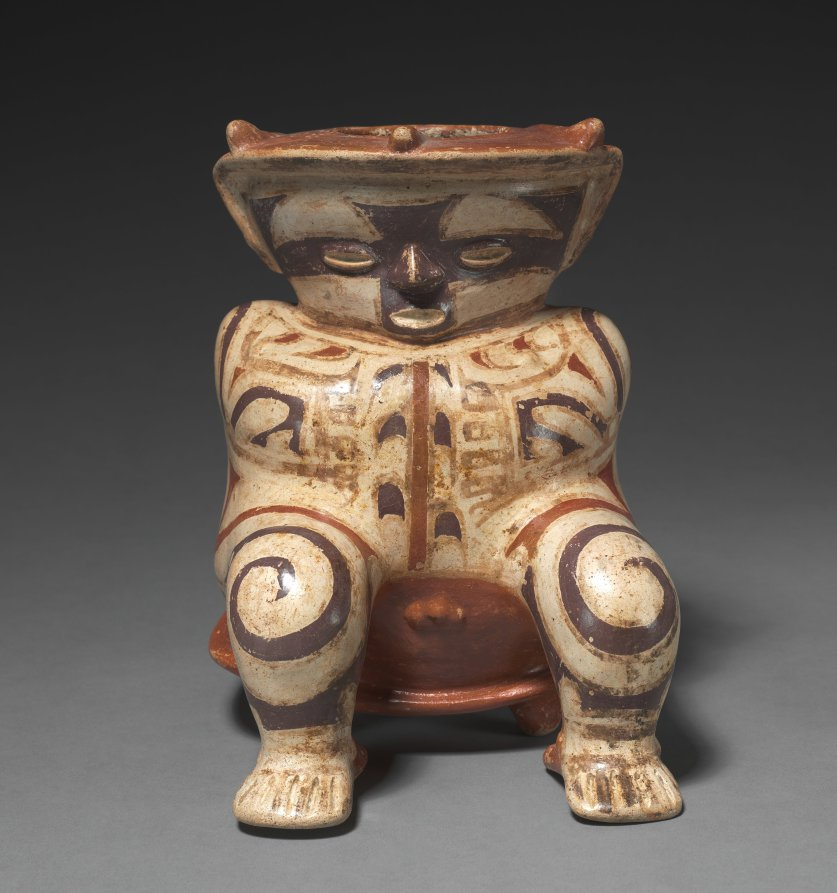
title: Hunchback Seated on a Stool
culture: Central Panama, Conte Style, c. 600-800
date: c. 600–800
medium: earthenware with colored slips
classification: Ceramic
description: The meanings of hunchbacks is not well-studied in Panamanian art. But to the north, in Mexico and Guatemala, such physical anomalies marked individuals of great spiritual power. A few of this figure’s features suggest that hunchbacks held similar status in Panama: The figure sits upon a four-legged stool, a symbol of authority, and the mythic creatures painted on each side may connect the figure to the supernatural realm.